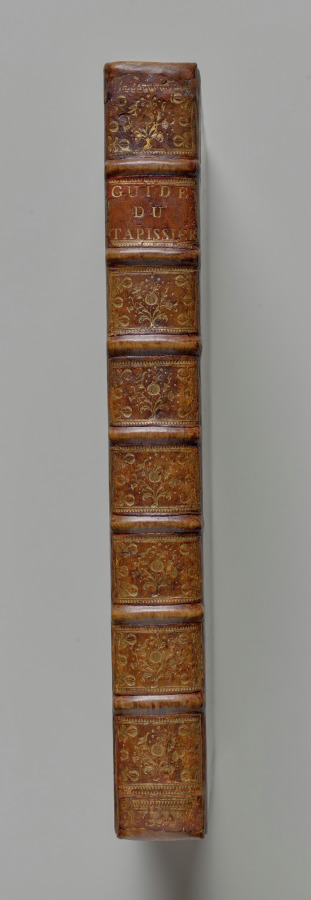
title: The Gentleman and Cabinet-Maker's Director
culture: Britain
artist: Thomas Chippendale (British, 1718–1779)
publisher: T. Becket & P. A. de Hondt (British)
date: 1762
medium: Paper, leather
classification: Bound Volume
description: Through his designs for furniture and architectural elements, Thomas Chippendale became one of the most influential tastemakers of the 1700s. He published three editions of The Gentleman and Cabinet-Maker’s Director (1754, 1755, and 1762), which sold widely in Britain, Ireland, and America. This rare French version of the third edition demonstrates his effort to spread his designs for both naturalistic and neoclassical decoration even wider across Europe.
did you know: Fewer than fifteen copies, including this one, of the French edition of Thomas Chippendale’s famous book of designs, are known to exist.